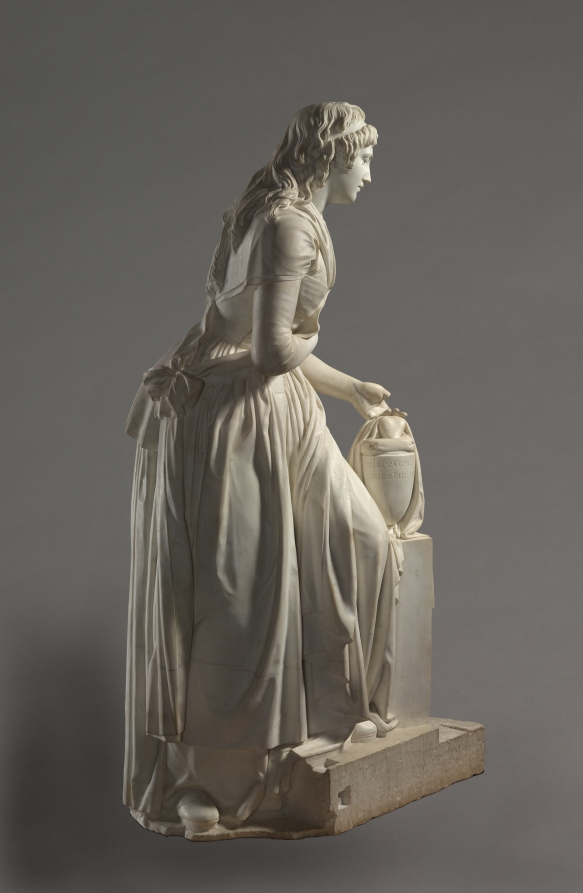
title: Funerary Monument for the Marquis de Tourney (for the Chapel of the Château de la Falaise)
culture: France, Paris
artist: François-Nicolas Delaistre (French, 1746–1832)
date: 1787–1793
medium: marble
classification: Sculpture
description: The Marquis Gallyot de Tourney commissioned this sculpture to serve as his funeral monument. It depicts a young woman gesturing with one hand toward an urn bearing the inscription Voilà ce coeur qui nous a tant aimé (Here is the heart that loved us so). The marquis specified that the figure should be a rosière, a virtuous woman of humble circumstances, a choice likely informed by the writings of Enlightenment philosophers, especially Jean-Jacques Rousseau, who championed greater social equality and democratic reform.